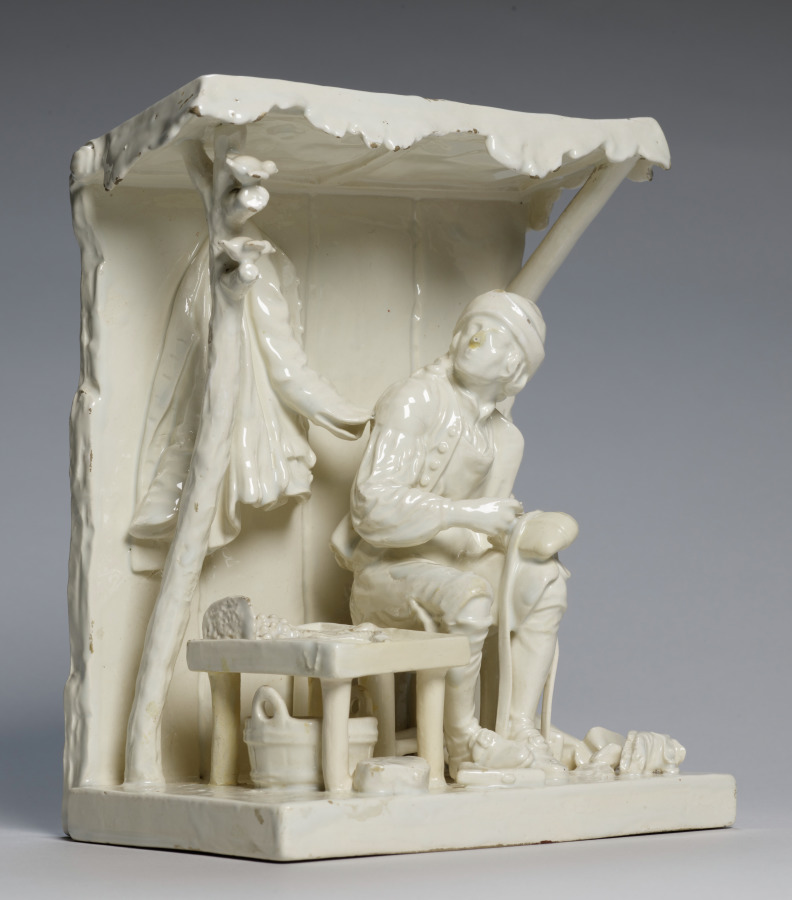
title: The Cobbler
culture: Italy or France, 19th century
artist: after a design by Paul-Louis Cyfflé (Flemish, 1724–1806)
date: 1800s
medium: earthenware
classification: Ceramic